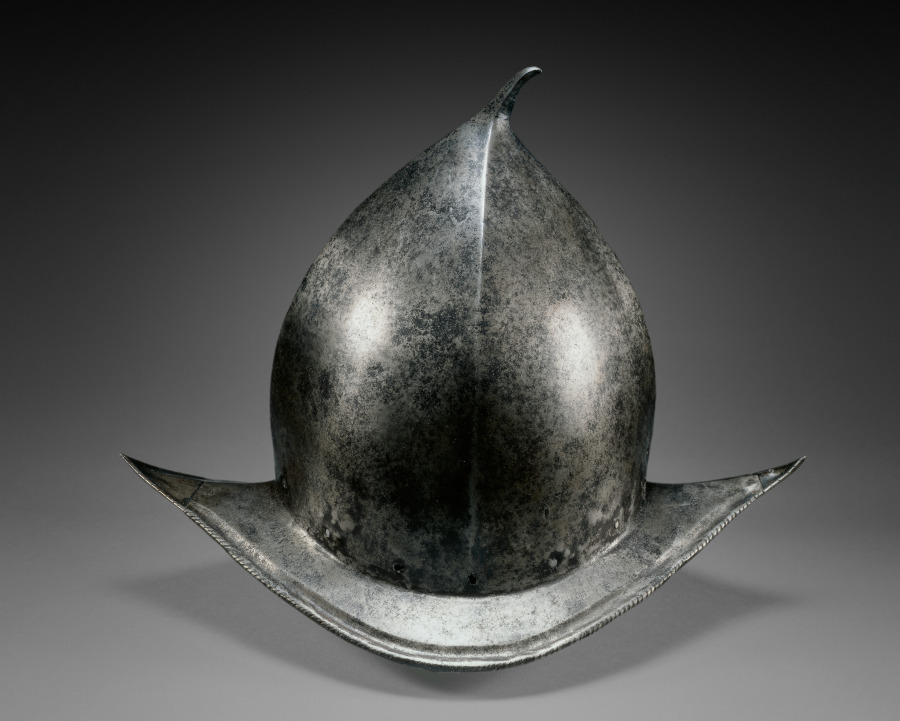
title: Pear-Stalk Cabasset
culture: Italy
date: c. 1580–90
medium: steel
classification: Arms and Armor